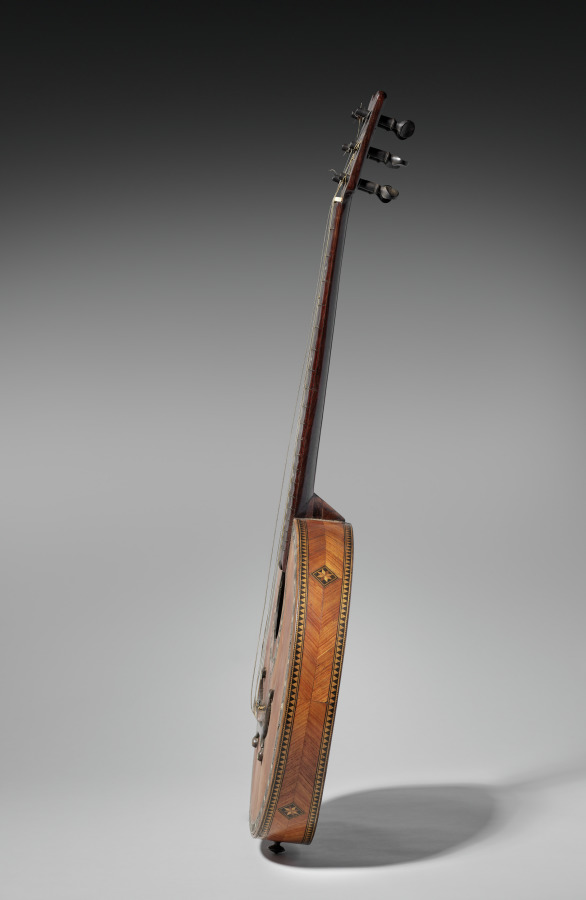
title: Guitar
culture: Italy, 19th century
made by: probably by Fernando Theze (Italian)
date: c. 1860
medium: wood, ebonized wood, mother of pearl inlay, resin, bone?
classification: Musical Instrument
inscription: label inside reads: "Faite a Turin par F. Theze--Amateur."